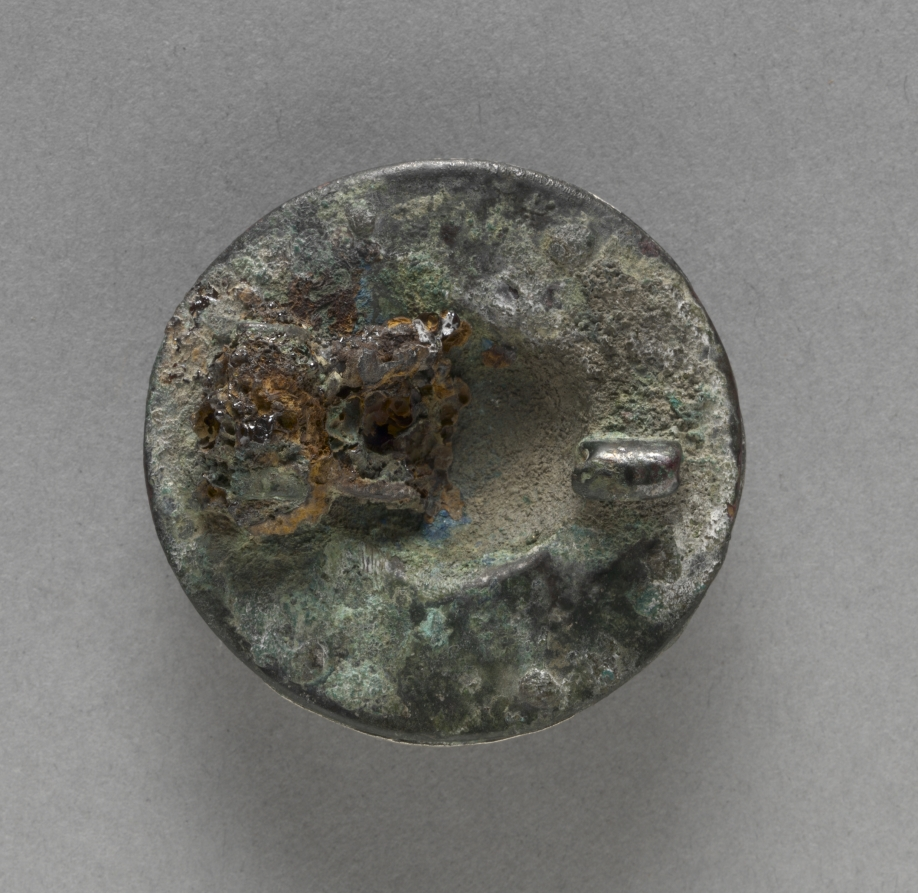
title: Filigree Disk Brooch with Central Boss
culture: Frankish, late Merovingian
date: late 600s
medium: gilt silver, copper alloy, glass, almandine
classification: Jewelry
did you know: This brooch is made out of gilt-silver, meaning silver that is covered by gold.